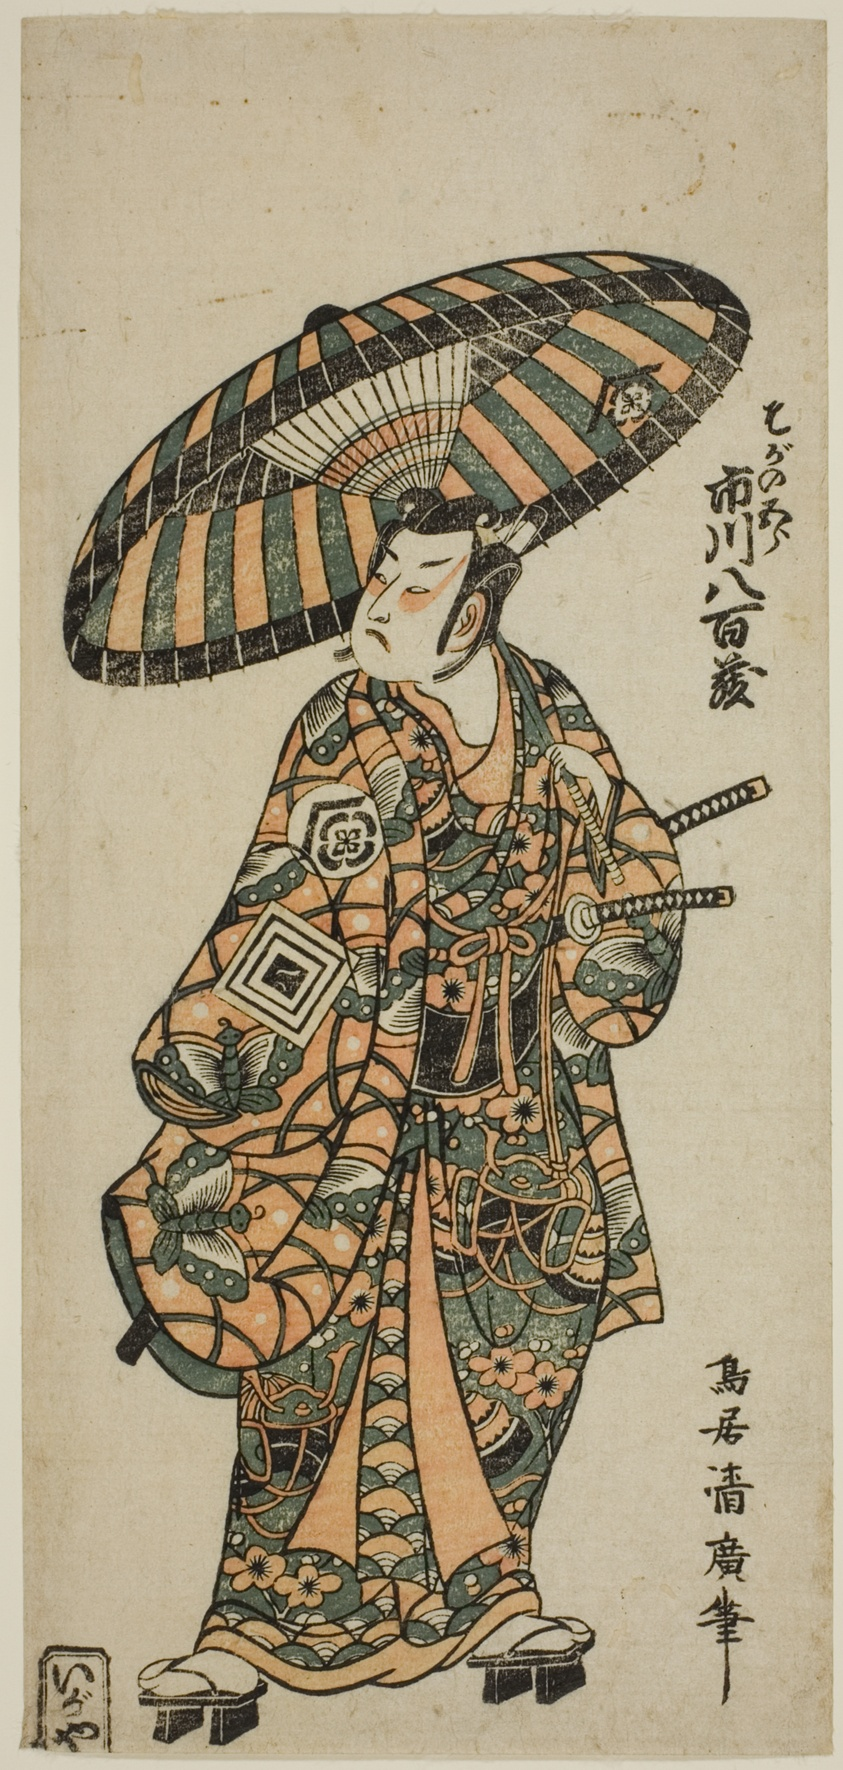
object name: Print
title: The Actor Ichikawa Yaozo I as Soga no Goro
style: Japanese (culture or style)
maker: Torii Kiyohiro (Japanese, active c. 1737-76)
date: c. 1752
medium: Color woodblock print; hosoban, benizuri-e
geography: Japan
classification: woodblock print; print; asian art